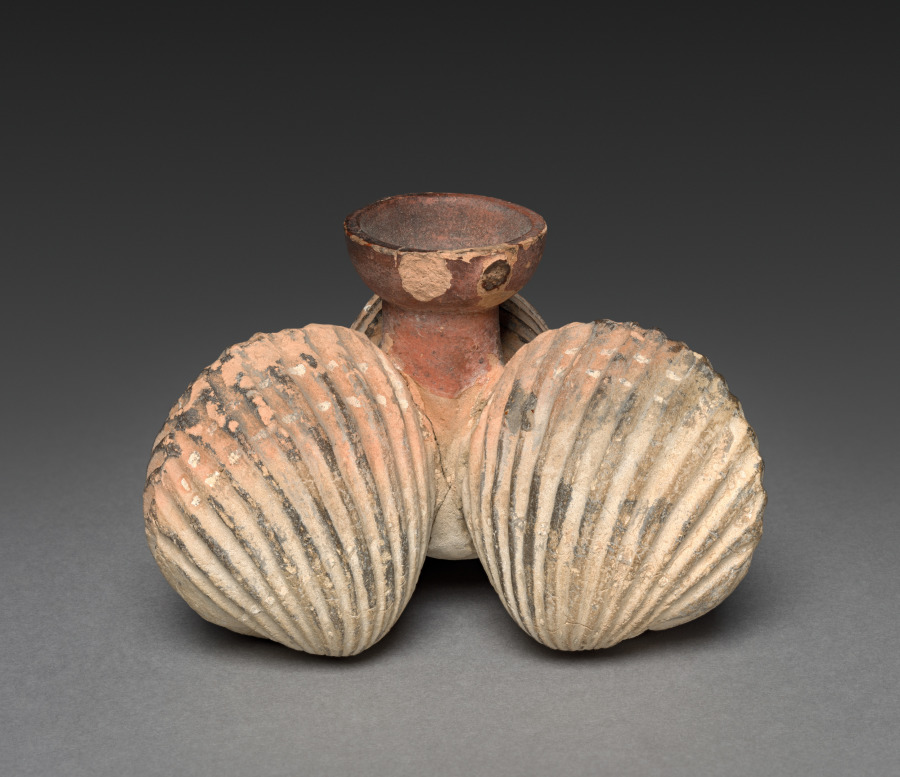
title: Cockleshell Aryballos (Oil Vessel)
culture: Greek, Attic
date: late 500s–early 400s BCE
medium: ceramic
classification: Ceramic